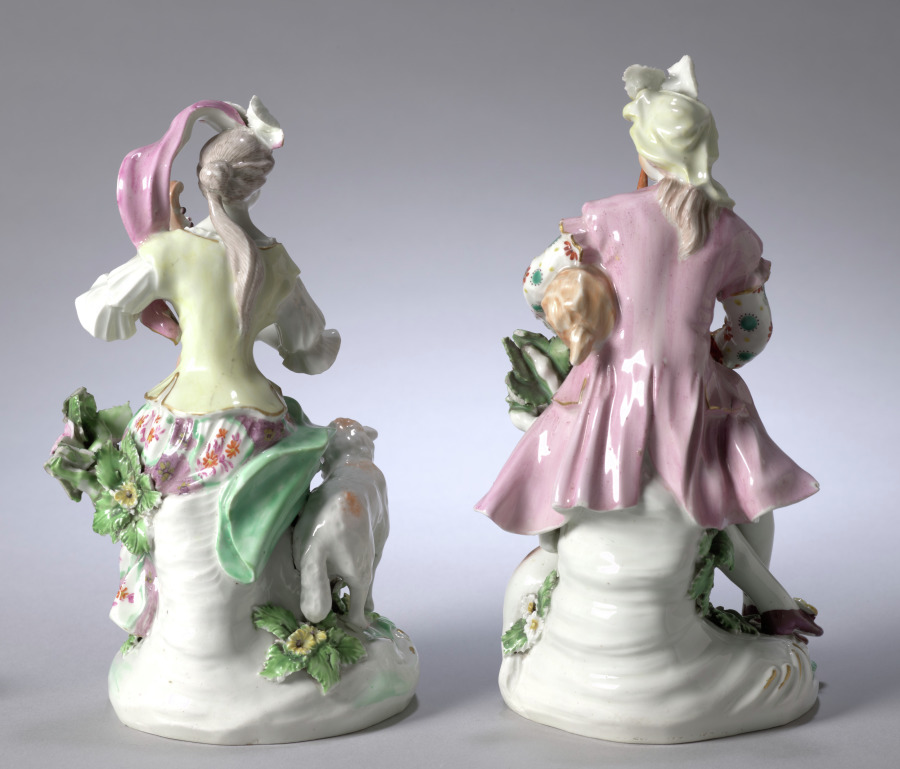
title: Seated Musicians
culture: England, Derby, 18th century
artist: Derby Porcelain Factory (British)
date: c. 1765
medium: soft-paste porcelain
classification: Ceramic